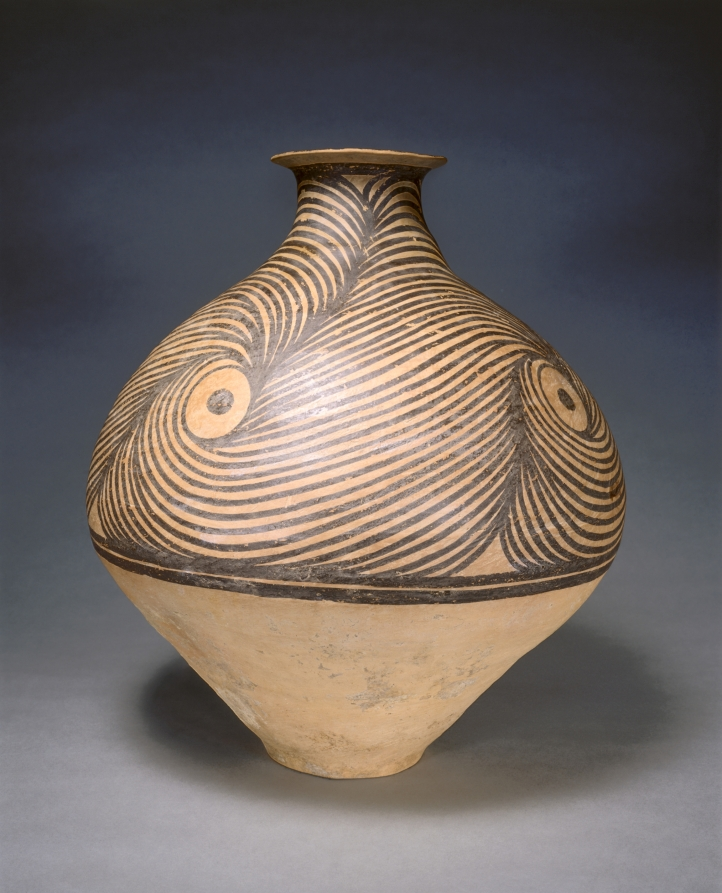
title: Jar with Spiral Designs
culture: Northwest China, Neolithic period, Majiayao culture, Majiayao phase (3300–2650 BCE)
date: 3300–2650 BCE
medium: earthenware with slip-painted decoration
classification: Ceramic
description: This jar is a spectacular example of painted pottery from the Majiayao culture, one of the regional cultures of prehistoric China. Its geometric patterns are probably abstract symbols transformed from a bird image, which may suggest a clan totem or nature spirits. Archaeological work confirms the coexistence of different regional cultures in ancient China, contesting the old belief that the Chinese civilization originated solely along the Yellow River. The artifacts of these cultures manifest distinctive characteristics; each one played a role in the formation of the greater Chinese civilization.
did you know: The spiral designs on this jar were made using an ancient Chinese pottery technique called slip painting.